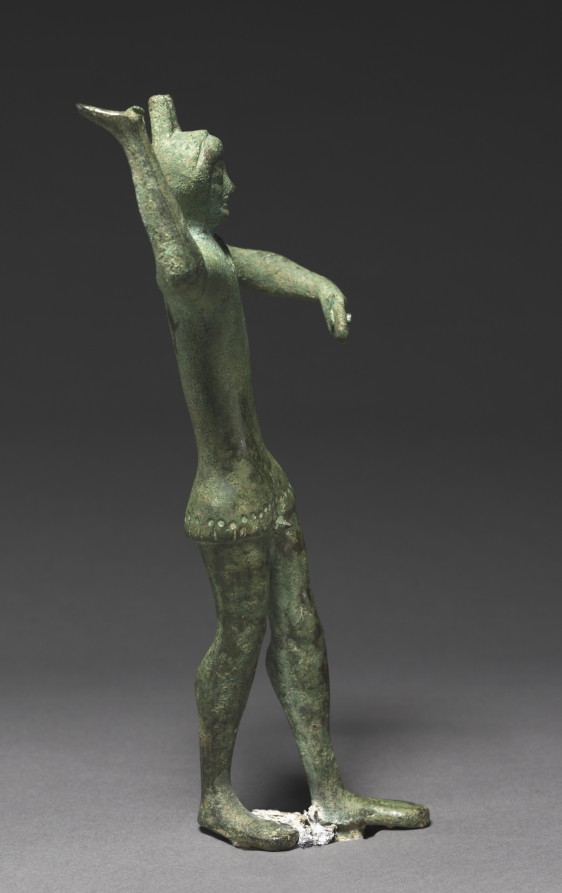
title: Statuette of a Warrior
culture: Etruscan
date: 500–450 BCE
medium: bronze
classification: Sculpture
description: Striding forward with its left foot, this warrior likely once held a shield in the left hand and a spear or sword in the right. The statuette was acquired together with a miniature bronze sword with which it was said to have been found; a photograph taken around 1890 shows the warrior with the sword attached—probably wrongly—to the left hand. He wears an unusual helmet with two raised elements on top, and a simple v-neck cuirass or tunic with a lower border of dots and flaps. Many similarly posed bronze figurines have been found across central Italy, but scholars disagree as to whether they represent divine or mortal warriors.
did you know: The lump of lead beneath its feet probably once secured this figurine to a base.